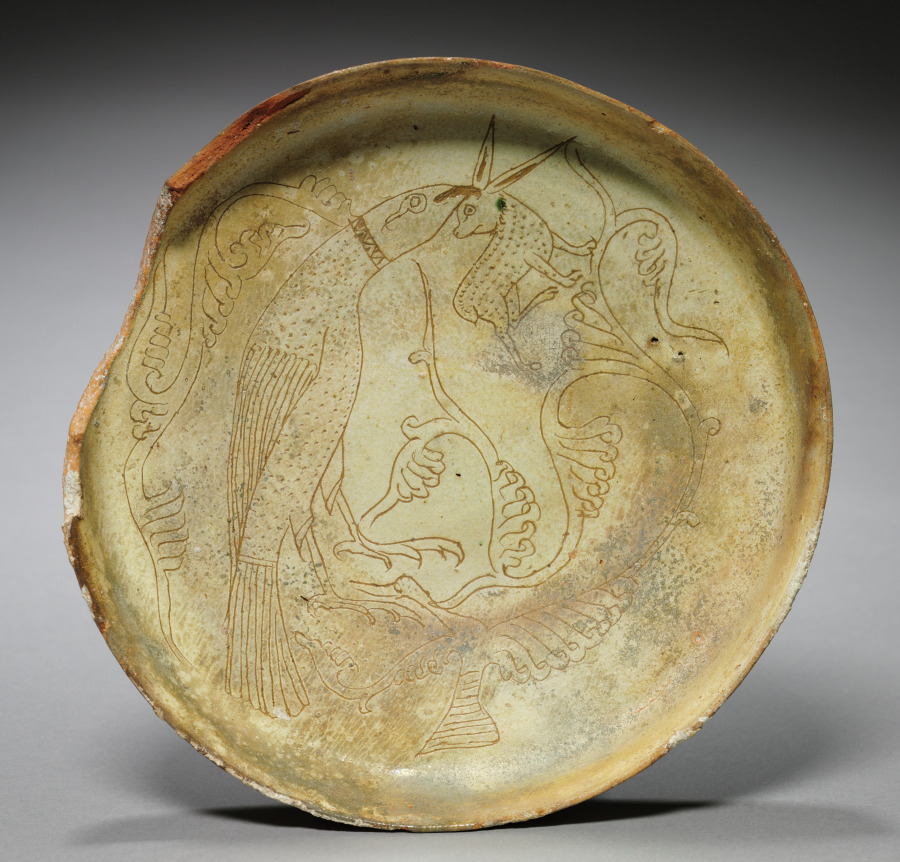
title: Deep Plate with Hawk, Rabbit, and Foliage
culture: Byzantium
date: 1100s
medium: sgraffito earthenware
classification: Ceramic